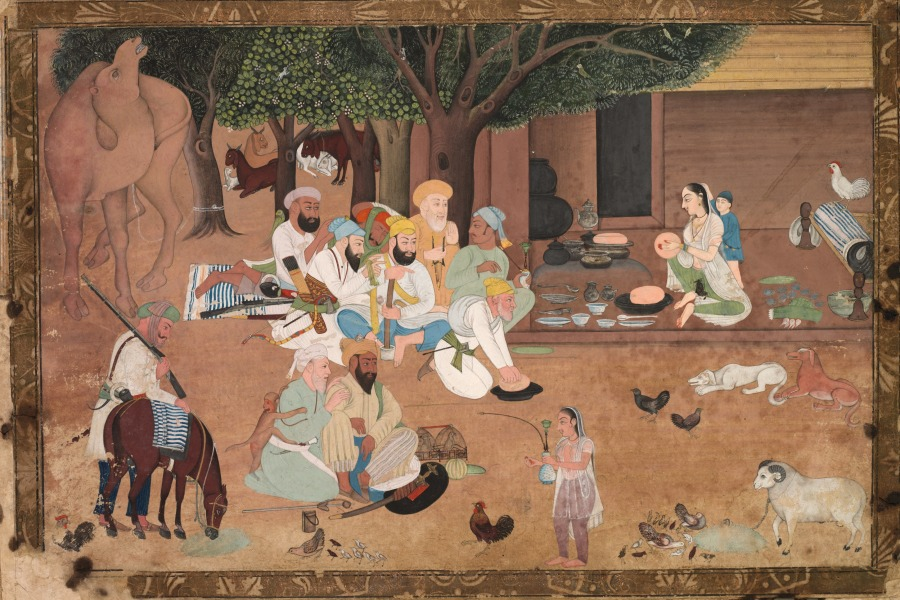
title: Traveling Warriors Stopping at a Farm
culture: India, Rajasthan, Jodhpur school, early 19th Century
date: c. 1800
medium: Gum tempera and ink on paper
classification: Painting